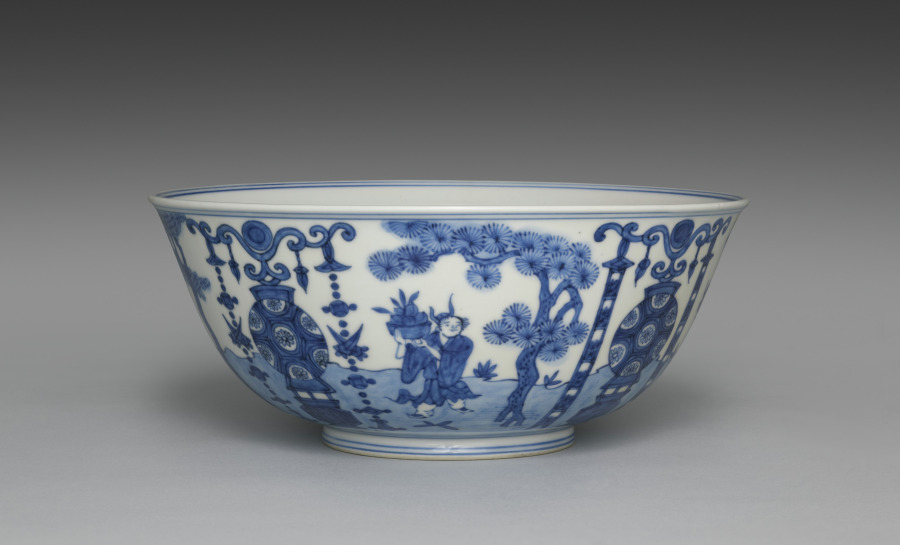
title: Bowl from Nesting Bowls with Daoist Immortals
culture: Japan, Meiji period (1868–1912)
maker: Seifū Yohei III (Japanese, 1851–1914)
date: 1893–1914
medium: Middle bowl from a set of three bowls; porcelain with underglaze blue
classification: Ceramic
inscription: 大日本清風造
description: Yohei III was capable of ink painting–like compositions in underglaze blue, as well as more decorative ones like that on this set of three nesting bowls. Bowls with very similar designs in five colors were produced in the reign of the Wanli emperor (r. 1572–1620 ) during the Ming dynasty, and Yohei must have had direct access to one of these or to a close copy. A scene of Daoist immortals is presented on the bowls. On each one, the ground plane is defined with a blue wash. Four lanterns are evenly spaced around the bowl. Two are flanked with linked-piece metalwork banners of the seven treasures. The alternate altars are adorned with textile banners. In between them are four immortals, each standing beneath a tree with small plants surrounding his feet. Two of the immortals hold fruit on a tray. Another carries an elixir-filled ewer and a willow branch. The fourth holds a swastika (manji), here an auspicious symbol, and a flower. Curiously, the inscription inside each footring reads “Made by Seifu of Great Japan,” in emulation of the dynasty and reign inscriptions that appear on Chinese ceramics; but one can also see through the translucent glaze another inscription, “Seifu Yohei,” written in large characters within a double band of blue on the largest bowl.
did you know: In the bottom of each bowl is a scene of two robed immortals who appear to stand on a precipice in a mountainous landscape high in the clouds, with celestial orbs over their heads.